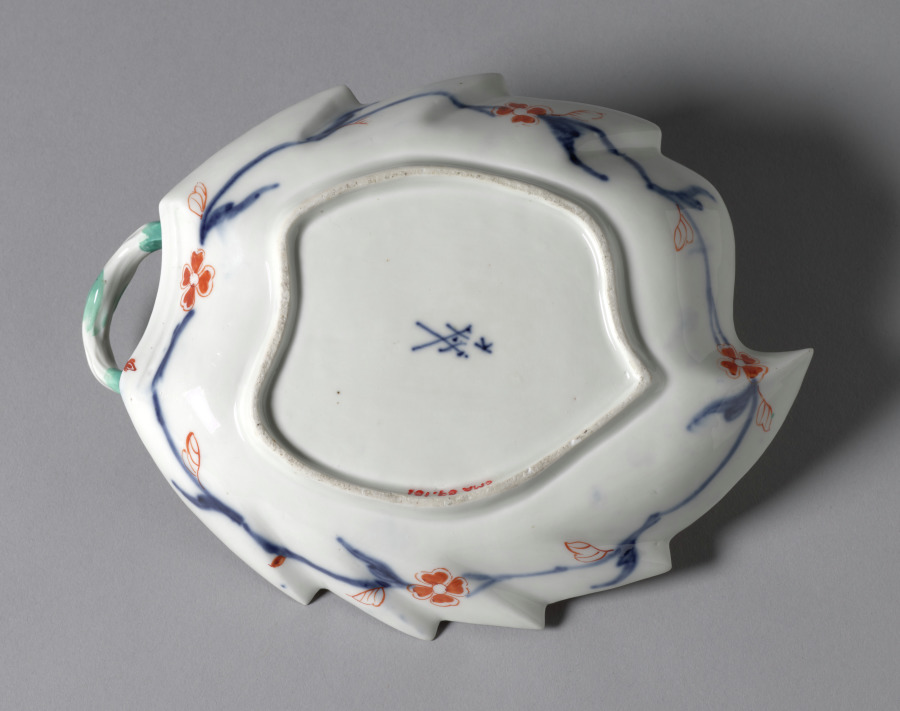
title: Leaf Dish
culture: Germany, Meissen, 18th century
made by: Meissen Porcelain Factory (German, est. c. 1710)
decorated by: possibly by Johann David Kretschmar (German)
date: c. 1735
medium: porcelain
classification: Ceramic